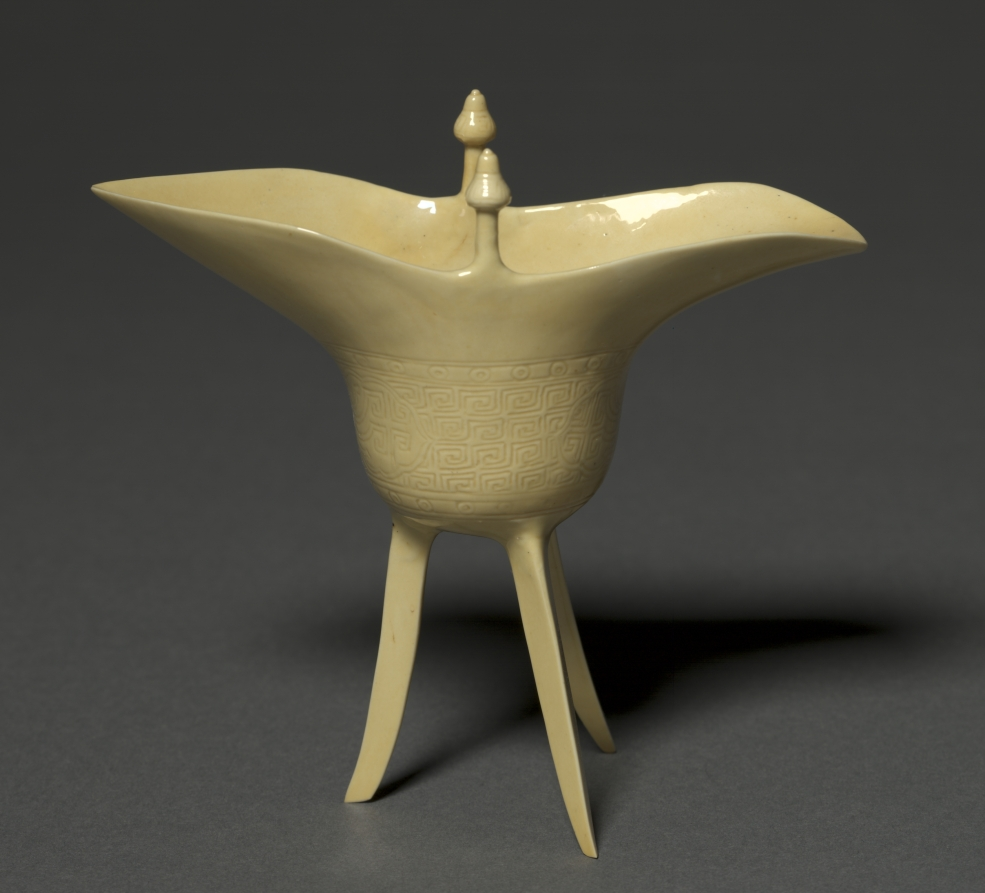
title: Libation Cup in the Form of a Jue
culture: China, Jiangxi province, Jingdezhen, Qing dynasty (1644-1911), Kangxi period (1662-1722)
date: 1662–1722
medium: porcelain with incised and applied decoration and yellow glaze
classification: Ceramic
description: A jue is an ancient Chinese vessel originally designed for serving wine during ceremonies. Bronze jue became prominent during the Shang (c. 1500–1050 BCE) and Zhou (1050–221 BCE) dynasties. This particular piece, made of porcelain during the Qing dynasty (1644–1911), emulates the earlier bronze designs. It reflects the owner's taste for antiquity.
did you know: The handle is decorated with a dragon mask, while the body has a fret pattern in the incised underglaze.